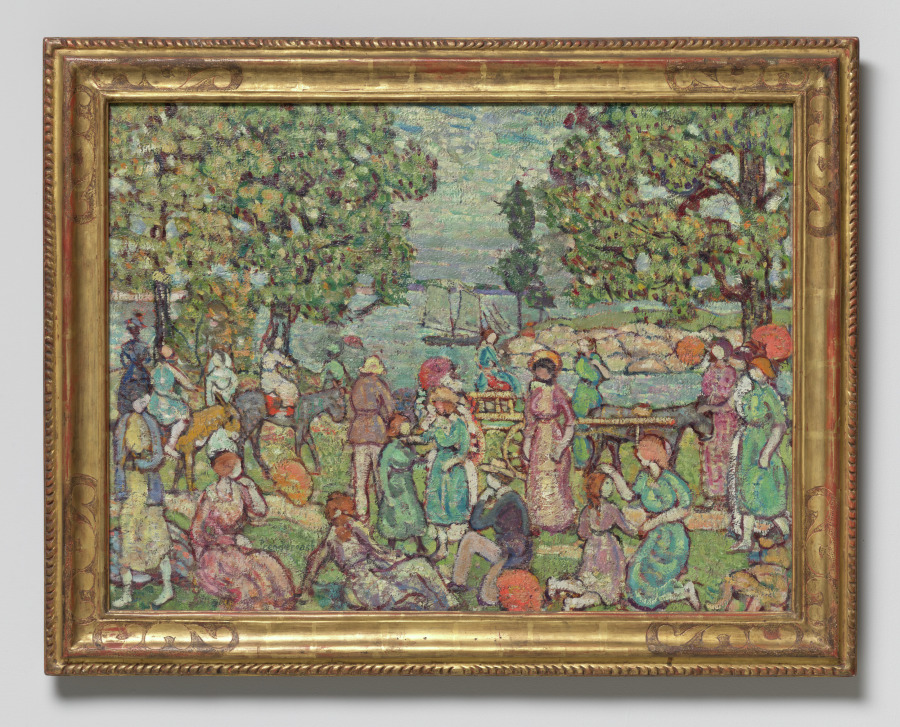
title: On the Beach, No. 3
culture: America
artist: Maurice Prendergast (American, born Newfoundland [now Canada], 1858–1924)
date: c. 1915–18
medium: oil on canvas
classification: Painting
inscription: signed lower left: Prendergast; annotated on verso, "The Beach."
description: Prendergast developed a distinctive painting style featuring rounded patches of thickly applied color. Like many of his works, On the Beach, No. 3 visually approximates a densely woven tapestry.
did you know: Three modes of transportation appear in this composition: a ship, horse, and donkey cart.